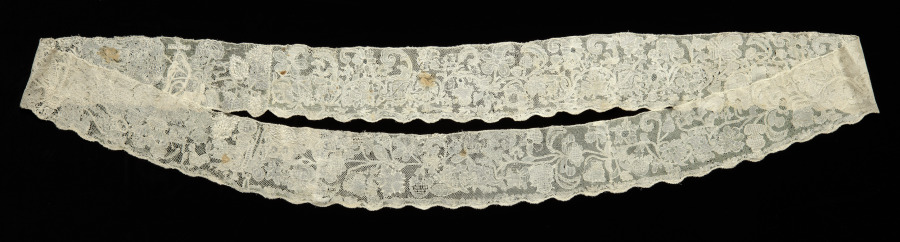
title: Flounce for Alb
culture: Unassigned, 1700s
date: 1700s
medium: Linen: needle lace (drawnwork) and embroidery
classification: Lace